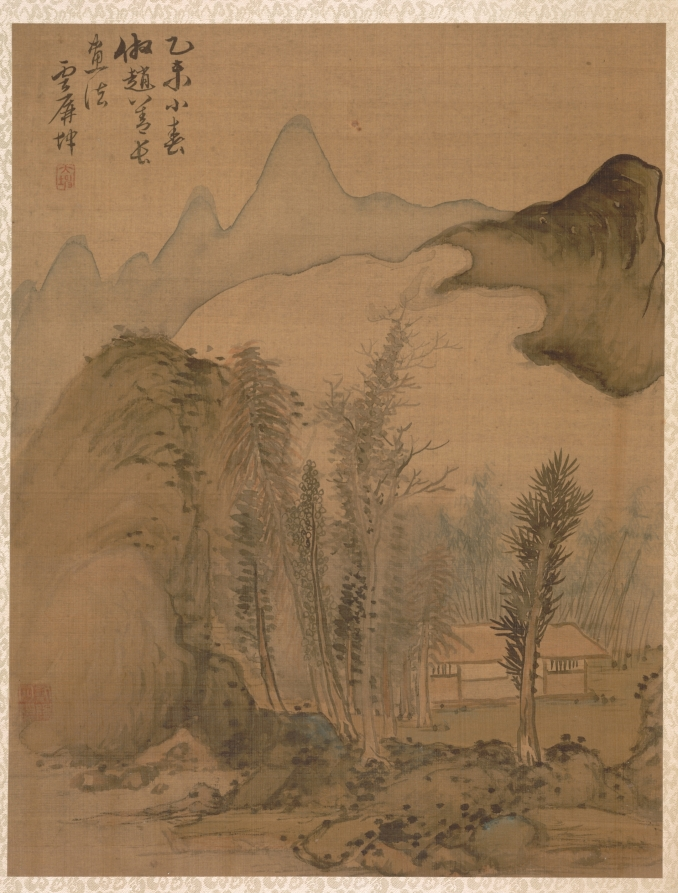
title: Landscape in the Style of Chao Yuan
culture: China, Qing dynasty (1644-1911)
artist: Zhai Dakun (Chinese, d. 1804)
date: 1775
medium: album leaf; ink and color on silk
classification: Painting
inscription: Hut Amidst Trees In the tenth lunar month (xiao chun) of the year yiwei (1775), in the manner of Zhao Shanzhang (Zhao Yuan; 14th Century) Yunping Kun. Seal: r/r: "Dakun"